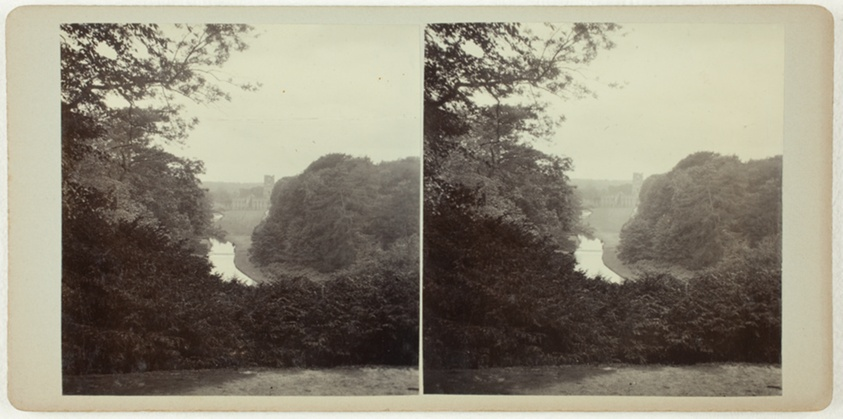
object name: Photograph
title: Untitled (Fountains Abbey Surprise View)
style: 19th century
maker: Artist unknown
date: 1860s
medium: Albumen print, stereo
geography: Fountains Abbey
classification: photograph; albumen silver print; photography